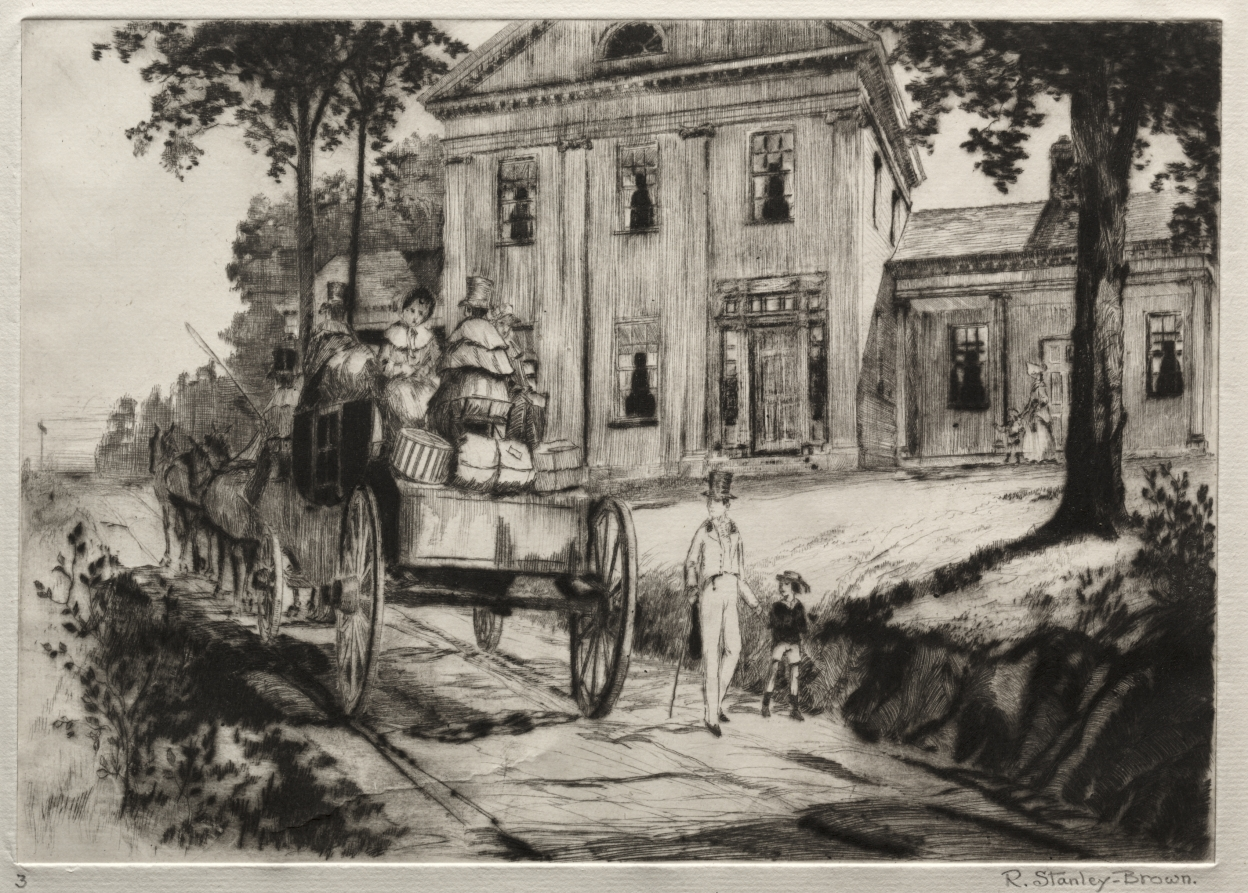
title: The Thirties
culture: America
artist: Rudolph Stanley-Brown (American, 1889–1944)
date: c. 1909–25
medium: drypoint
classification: Print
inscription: Penciled on lower-right corner: R. Stanley-Brown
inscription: Penciled on lower-left corner: 3